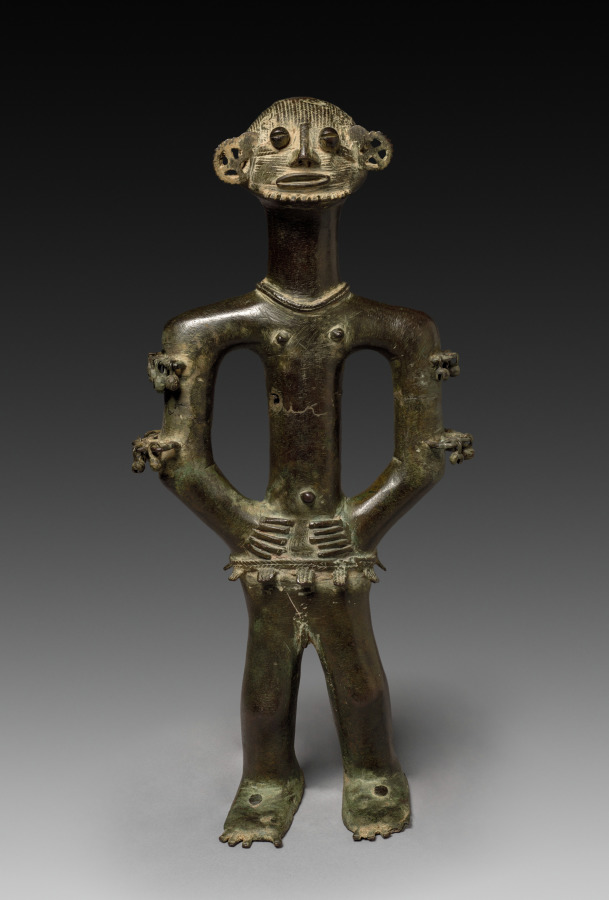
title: Male figure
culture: Africa, West Africa, Nigeria, Benue River Valley, Unidentified maker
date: probably 1800s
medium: Copper alloy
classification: Sculpture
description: Realized in a very distinctive style using the lost-wax method, this figure’s cultural origin and function is limited because it was removed from Nigeria during that country’s turbulent civil war of the late 1960s. Perhaps it was once part of an altar or shrine dedicated to a guardian or tutelary spirit. Connotations of prestige and wealth may explain why copper-alloy objects were diffused across vast territory and inherited over many generations.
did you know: Figurative copper-alloy objects like this sculpture point to intense trade and the circulation of people, goods, and technologies in the Benue River Valley, resulting in a highly cosmopolitan society.